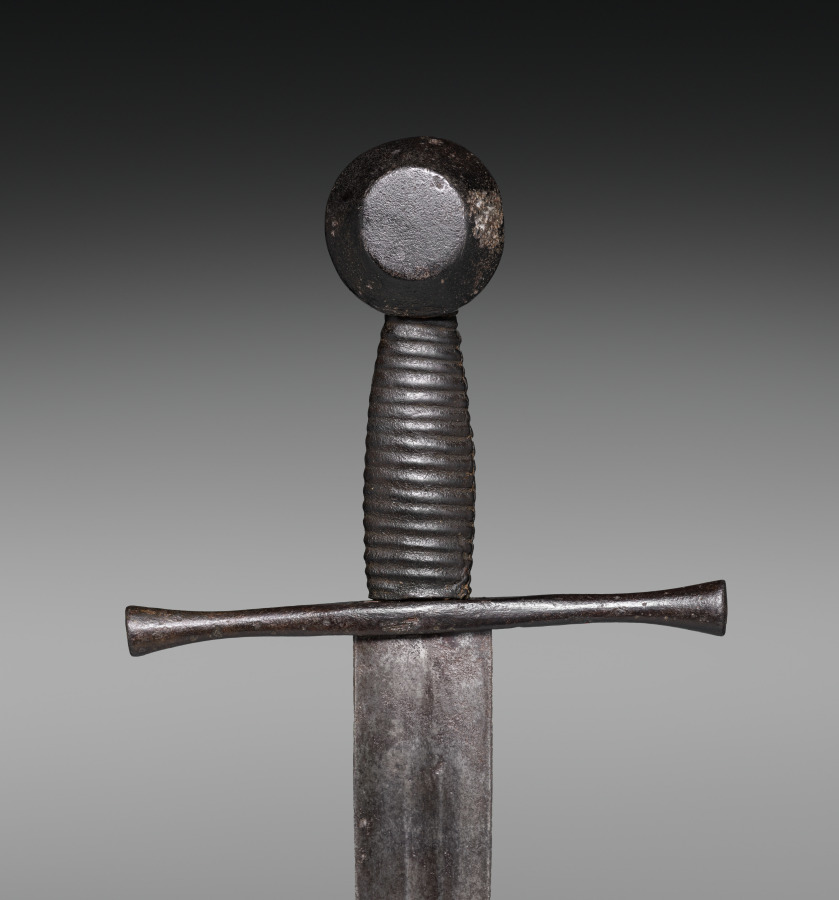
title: Sword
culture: Germany (?)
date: 1400s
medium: steel; wood and leather grip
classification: Arms and Armor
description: During medieval times, everyday objects carried deep spiritual meanings. The knight's sword was perceived as the noblest of weapons because its shape symbolized the cross on which Christ died.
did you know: The unornamented surfaces and signs of use on this sword and those similar to it lead us to believe that they were used in battle. Despite their utilitarian purpose, the blacksmith added details to the handles and hilts to make them visually appealing.